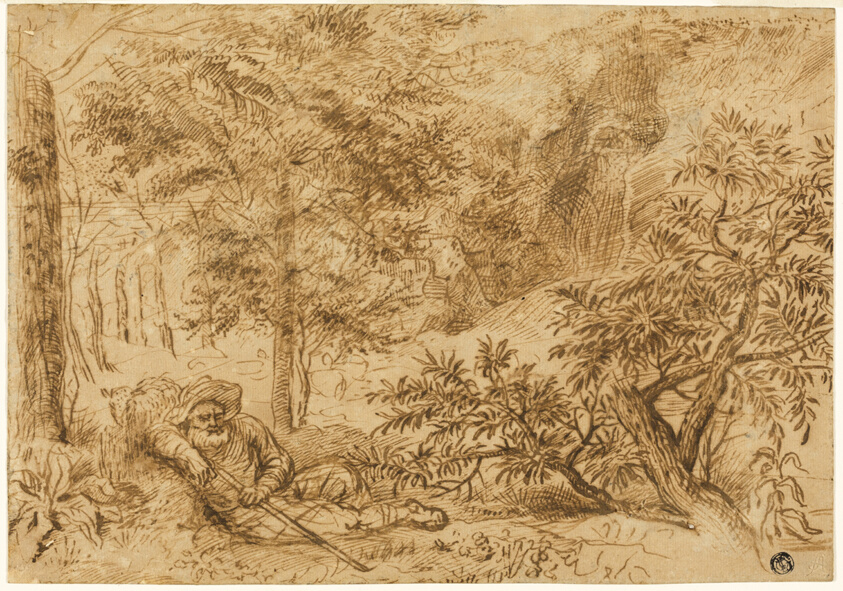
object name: Drawing and Watercolor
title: Landscape with Shepherd Sleeping under Tree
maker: Attributed to or a follower of Jan Andrea Lievens (Dutch, 1607-1674); or possibly Lambert Lombard (Flemish, 1506-1566)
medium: Pen and brown ink on cream laid paper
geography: Netherlands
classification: pen and ink drawings; drawings (visual works); prints and drawing